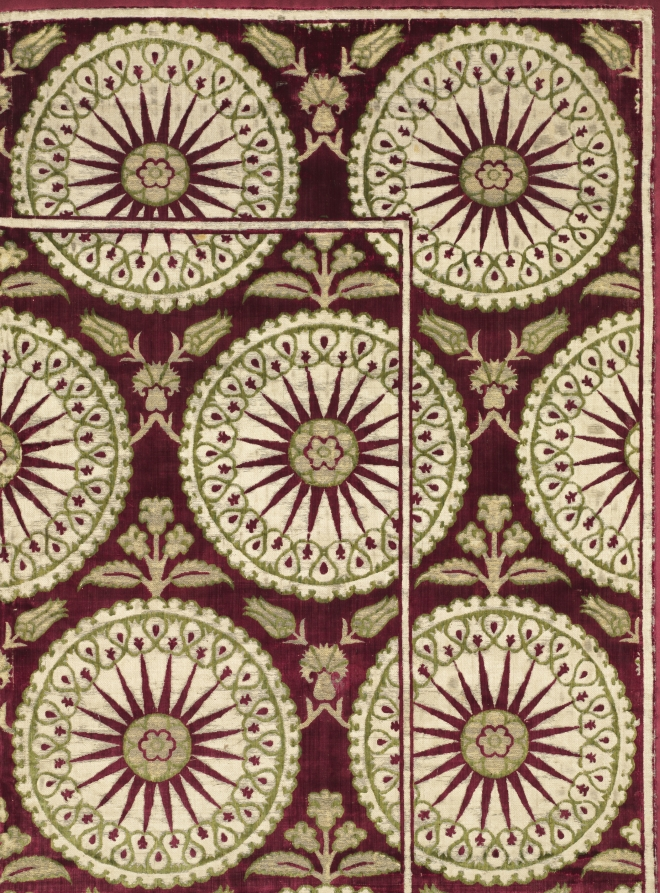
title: Brocaded velvet cover with sunbursts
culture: Turkey, Istanbul or Bursa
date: early 1600s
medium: velvet, brocaded: silk, gilt- and silver-metal thread, and cotton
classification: Textile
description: The rare sunburst pattern contrasts in its boldness with delicate floral motifs; the sunburst’s dynamic rays terminate in small tulips bearing hyacinths that alternate with peacock feathers. Interstitial motifs display the favorite telltale Turkish flora of carnations, tulips, and hyacinths. Quantities of luxury textiles were made for the Ottoman sultans, who were the largest consumers of textiles in the Western world by the mid-1500s and early 1600s. Textiles were lavishly displayed in ceremonies, presented as splendid robes of honor, and visible as furnishing fabrics in the Topkapi Palace in Istanbul where they spoke to the vast power and unfathomable wealth of the Ottoman Empire.